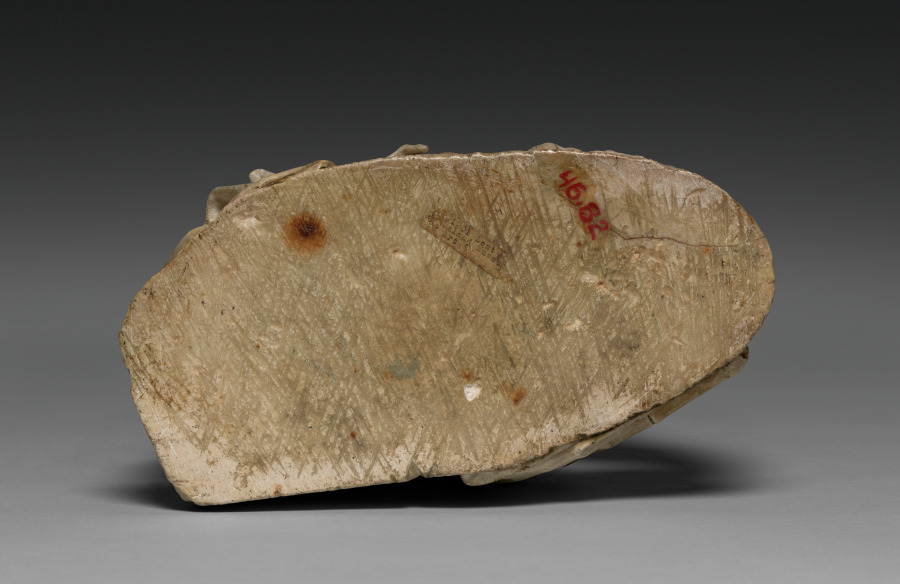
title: Saint Jerome and the Lion (From the former Church of St. Peter in Erfurt)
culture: Germany, Würzburg, late 15th Century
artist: Tilman Riemenschneider (German, active Würzburg, c. 1460–1531)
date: c. 1495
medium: alabaster, traces of polychromy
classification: Sculpture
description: According to legend, Saint Jerome (347–420 bce) lived in the desert, where he removed a thorn from an injured lion. Jerome is venerated in the Catholic Church as a Church Father, an important early author of Christianity. Here, he wears cardinal’s clothing from around 1500. Tilman Riemenschneider focused on Jerome’s relationship with the lion, creating empathy for the wounded animal. The delicacy of the depiction, which may have been partially painted to add highlights, is typical of alabaster, as is its fine polishing. The cord of the cardinal’s hat, missing today, may have been supplemented from another material.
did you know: In the story Saint Jerome encounters a fearsome lion, here depicted as diminutive, gentle, and submissive.